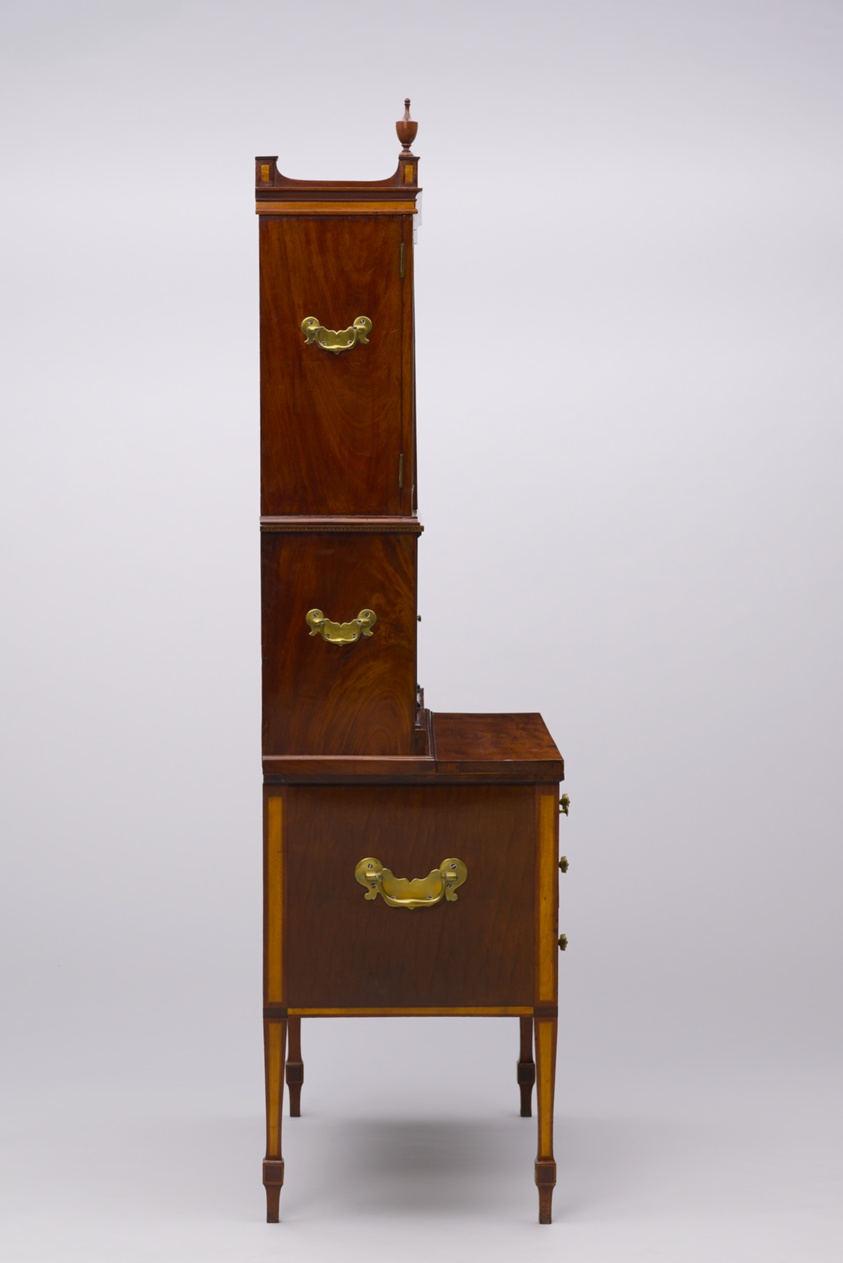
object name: Furniture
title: Tambour Desk and Bookcase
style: federal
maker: Attributed to the workshop of John and Thomas Seymour (American, active 1793–1804); Or attributed to the workshop of Thomas Seymour (American, active 1804–1817); Boston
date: c. 1800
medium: Mahogany, satinwood, white pine, cherrywood, chestnut, with brass, ivorine, and leather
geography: Boston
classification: furniture; american arts; american decorative arts; bookcase; decorative arts; desk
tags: furniture, cabinets, shelves, drawer, locks, keys, bookcase, decorative arts, desk, escutcheons